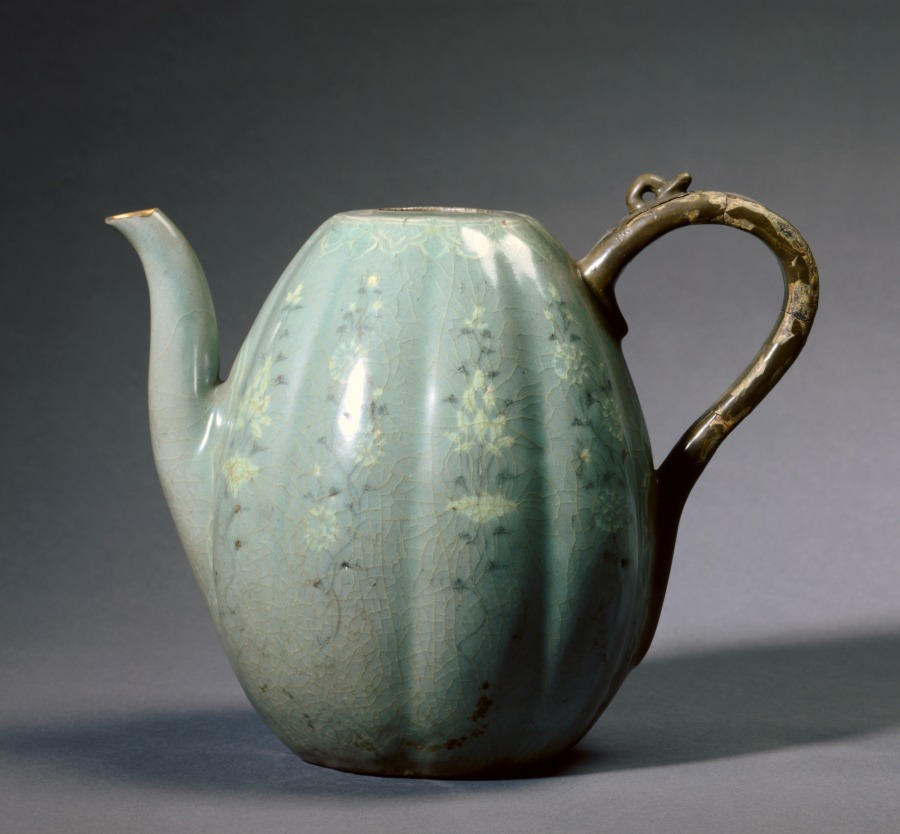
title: Melon-shaped Ewer with Incised Peony Design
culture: Korea, Goryeo dynasty (918–1392)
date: 1200s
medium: pottery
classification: Ceramic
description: This melon-shaped pitcher is adorned with a delicate drawing that renders chrysanthemum buds with full blossoms in white and black inlays. In Korea, chrysanthemum flowers and leaves were made into both tea and wine. Chrysanthemum wine was enjoyed during the the Double Nine Festival (the ninth day of the ninth month in the lunar calendar) when praying for longevity.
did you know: The shape of this pitcher resembles a type of yellow muskmelon cultivated mainly in East Asia.